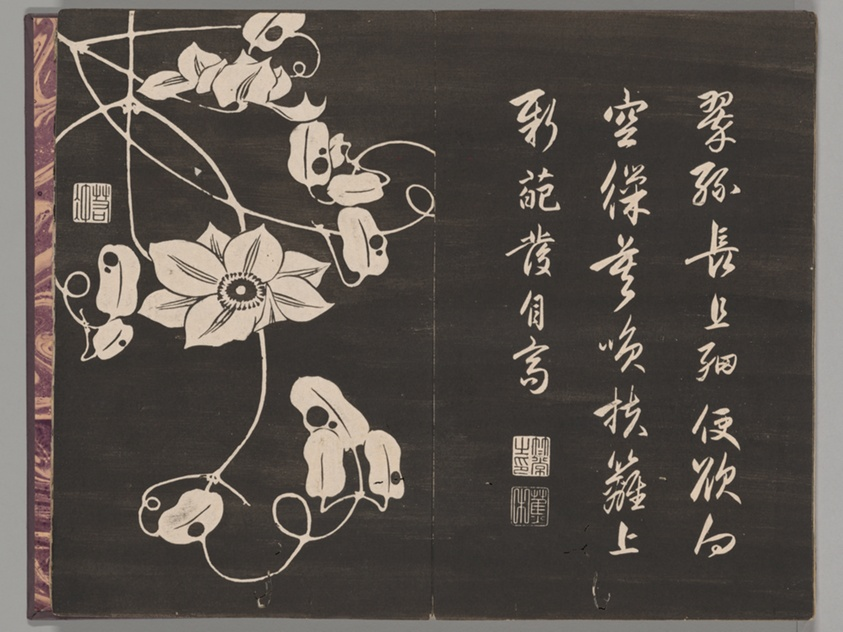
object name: Book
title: Soken sekisatsu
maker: Ito Jakuchu (Japanese, 1716-1800)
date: 1767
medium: Woodblock printed book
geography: Japan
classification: book